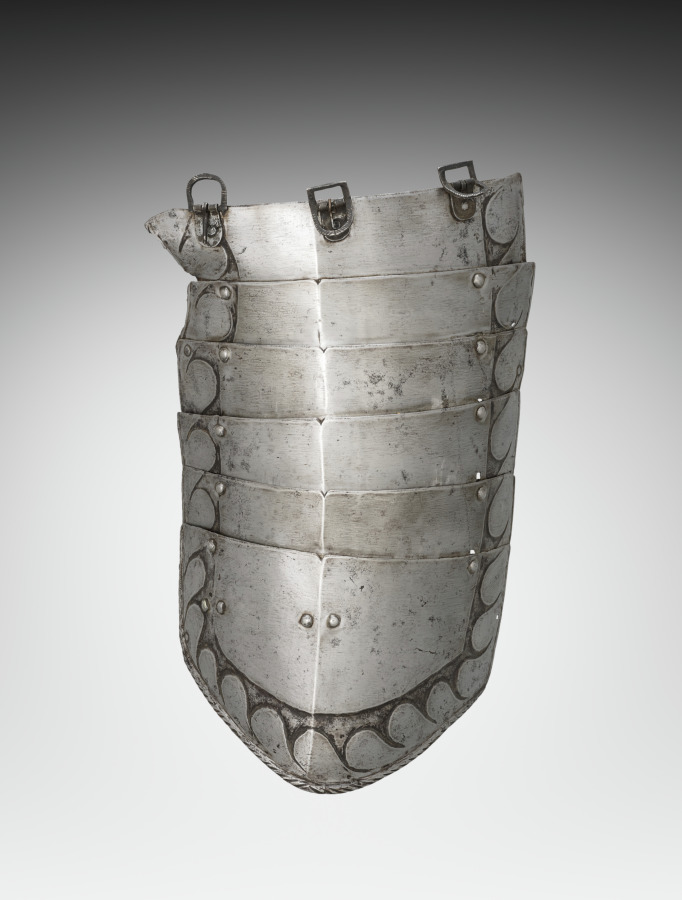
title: Tasset (2 of 2)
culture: Germany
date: c. 1540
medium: steel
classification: Arms and Armor